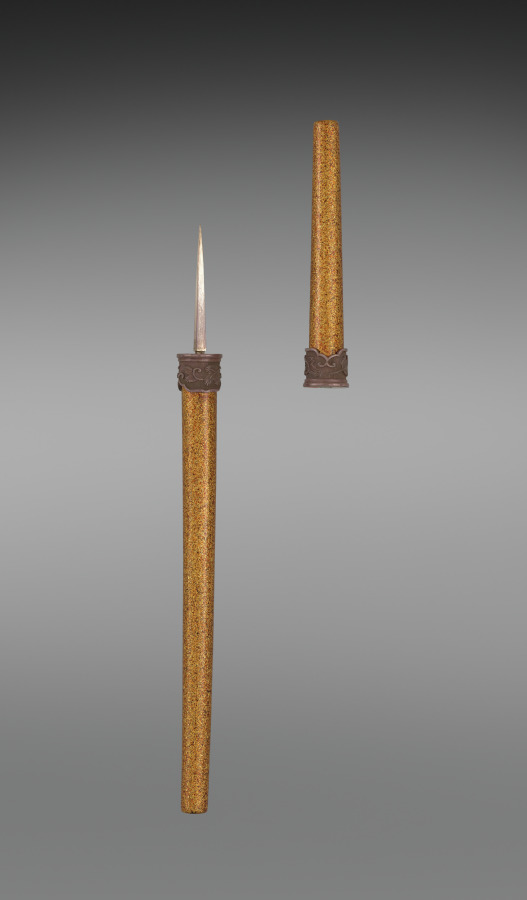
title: Writing Box (Suzuribako) with the “First Song” (Hatsune) Chapter from the Tale of Genji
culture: Japan, Meiji period (1868–1912)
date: early 1900s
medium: Lacquered wood with gold and silver sprinkled powder (maki-e), foil application (kirikane), and metal inlay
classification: Lacquer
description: The design of this box was inspired by an object in the 1639 lacquer wedding set of Chiyohime, the daughter of the shogun (ruler). Information about the set became available in the Meiji period, leading some lacquer artists to emulate its designs. This box features a scene from the chapter “First Song” (Hatsune) of the Tale of Genji, in which Prince Genji and his love Murasaki enjoy her garden. It incorporates the written characters for “first” (初, hatsu) and “sound” (音, ne), indicating the first song of the warbler in spring, associated with the new year—the water dropper for mixing the ink is in the shape of this bird.